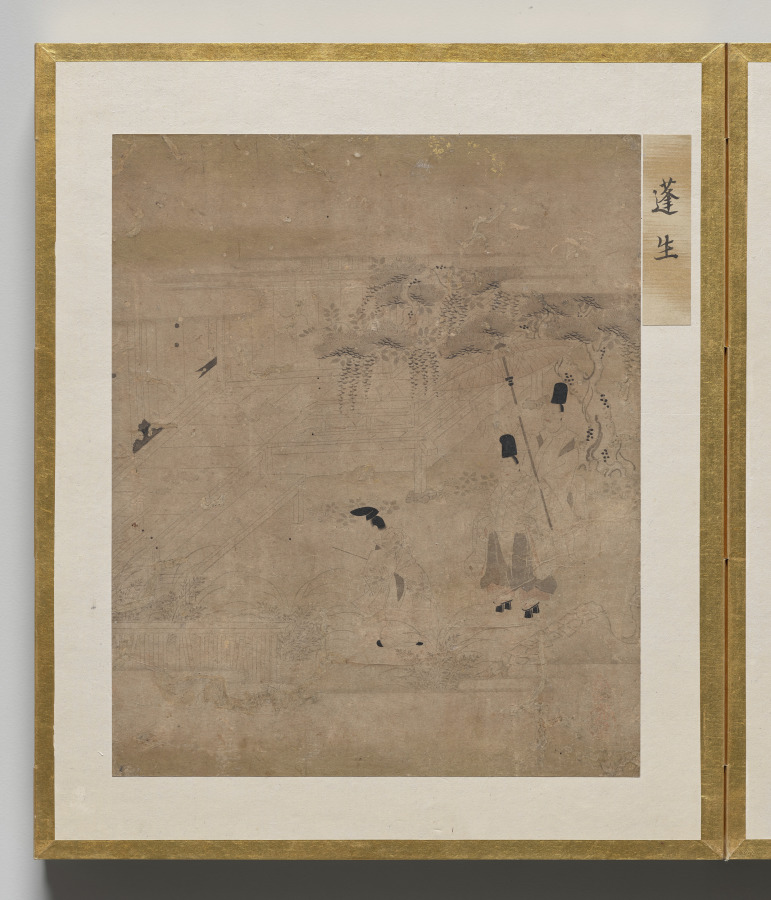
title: Wormwood Patch from Album of Illustrations for the Tale of Genji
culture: Japan, Edo period (1615–1868)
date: 1600s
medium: painting in an accordion-style album; ink, light color, and gold on paper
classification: Bound Volume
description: This album contains illustrations for the classic literary work the Tale of Genji, authored in the 1000s by Murasaki Shikibu, an aristocrat of the Heian period (794–1185) court. The scenes are painted in the “white drawing” (hakubyō) mode, in which a fine ink line is used to depict figures and spaces with great subtlety, punctuated only occasionally by traces of red pigment for a character’s lips, a detail of a garment, or a decorative element. These two scenes illustrate episodes from the chapters “Thin Veil of Cloud” (Usugumo) and “Barrier Gate” (Sekiya).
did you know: The illustrations are identified by chapter title in cartouches to the upper right of the paintings.